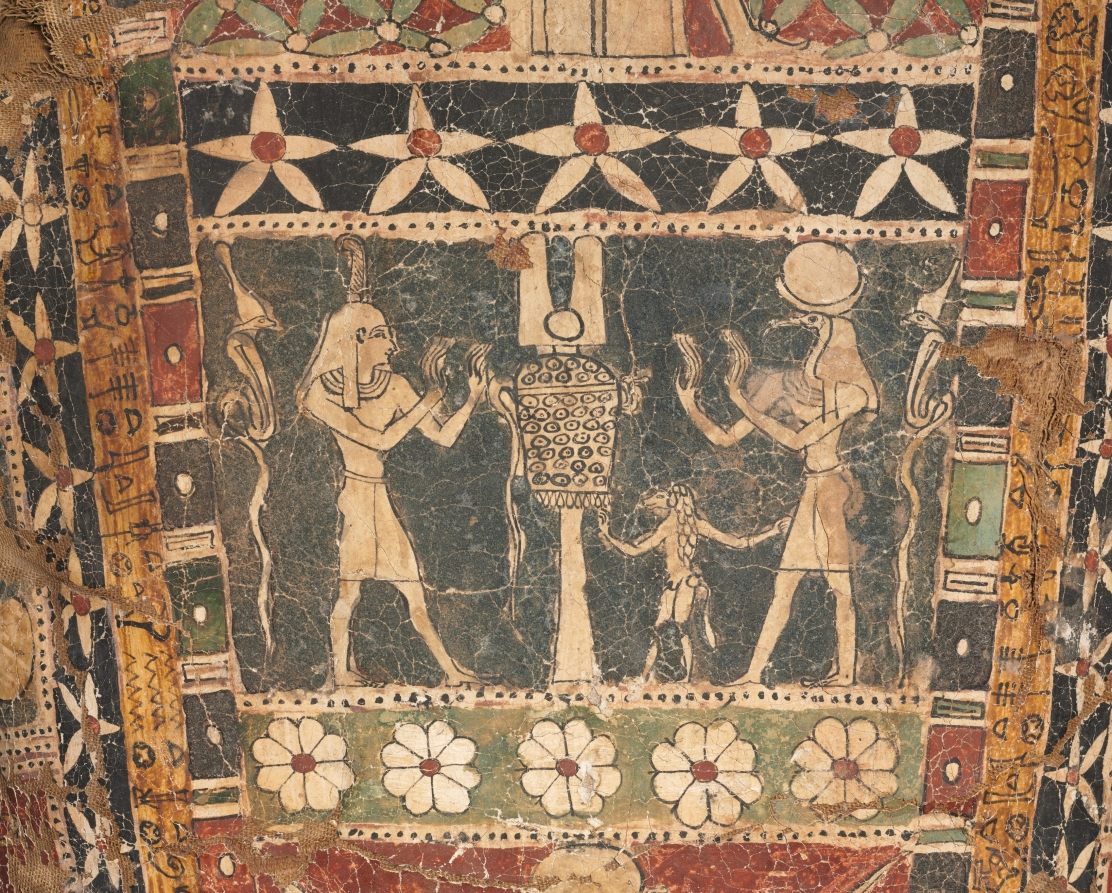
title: Cartonnage Mummy Case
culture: Egypt, Greco-Roman period (332 BCE–395 CE), Ptolemaic dynasty (305–30 BCE)–Roman empire (30 BCE–395 CE)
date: c. 50 BCE–50 CE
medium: cartonnage, painted and gilded, with glass inlays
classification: Funerary Equipment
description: This mummy case is made of cartonnage, a material similar to papier-mâché, but using layers of linen rather than paper. Cartonnage mummy cases such as these are contemporary with funerary portraits painted on wood or linen, although they present a very different appearance. The face, modeled in plaster, is bland and idealized, although the effect of the gilding and glass inlays is quite dazzling. The body is painted with traditional, age-old funerary motifs: the god Osiris, seated and mummiform; the fetish of Abydos, holy city of Osiris, flanked by standing deities (Thoth and Shu); a Horus falcon with outspread wings, and the bark of Sokar. Below these are the sandaled feet of the deceased. On the sides are rows of seated deities. On the top of the head are a winged scarab beetle flanked by Anubis jackals. On the foot are painted the soles of the deceased’s sandals, flanked by scorpions for protection.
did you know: This coffin is smaller and later in date than the other coffins in this gallery. It is made of cartonnage, which used layers of linen to create a material similar to papier-mâché. The painted portrait head displays the influence of Roman portraiture at this time and incorporates both gilding and glass inlays. Despite the fragile materials, this mummy case survived due to the very dry desert climate in which it was found.